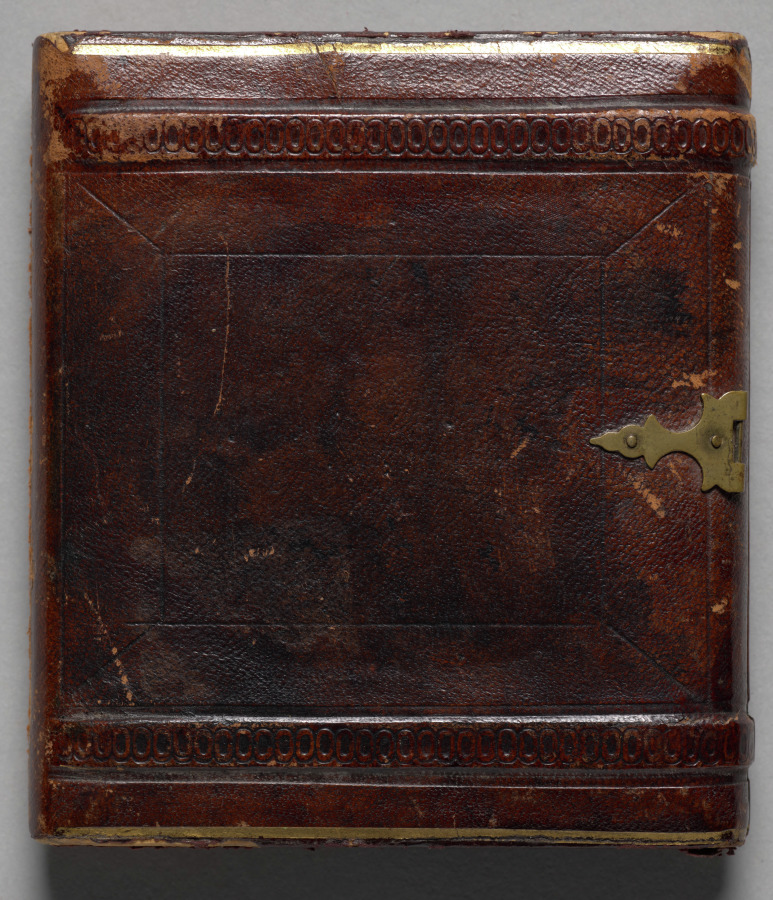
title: Miner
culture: America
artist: Robert H. Vance (American, 1825–1876)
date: c. 1853–55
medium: daguerreotype, sixth plate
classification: Photograph